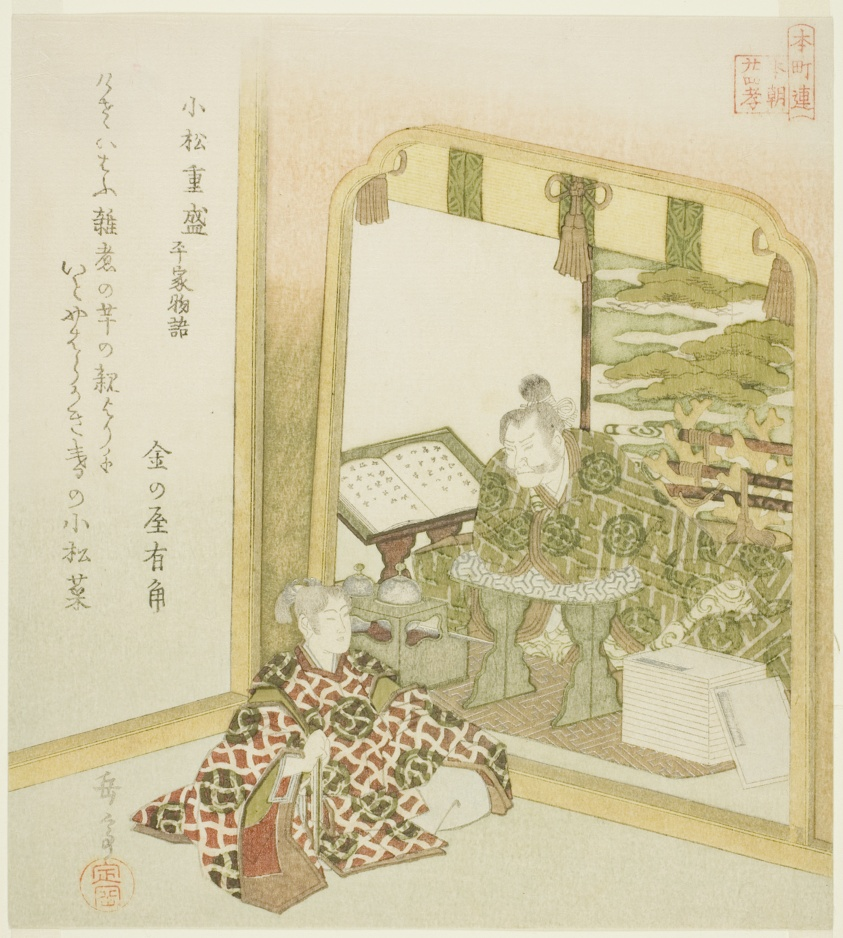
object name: Print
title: Komatsu Shigemori from the Tales of Heike (Komatsu Shigemori, Heike monogatari), from the series "Twenty-four Japanese Paragons of Filial Piety for the Honcho Circle (Honchoren Honcho nijushiko)"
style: Japanese (culture or style)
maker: Yashima Gakutei (Japanese, 1786 (?)-1868)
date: c. 1821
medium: Color woodblock print; shikishiban, surimono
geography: Japan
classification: woodblock print; print; asian art